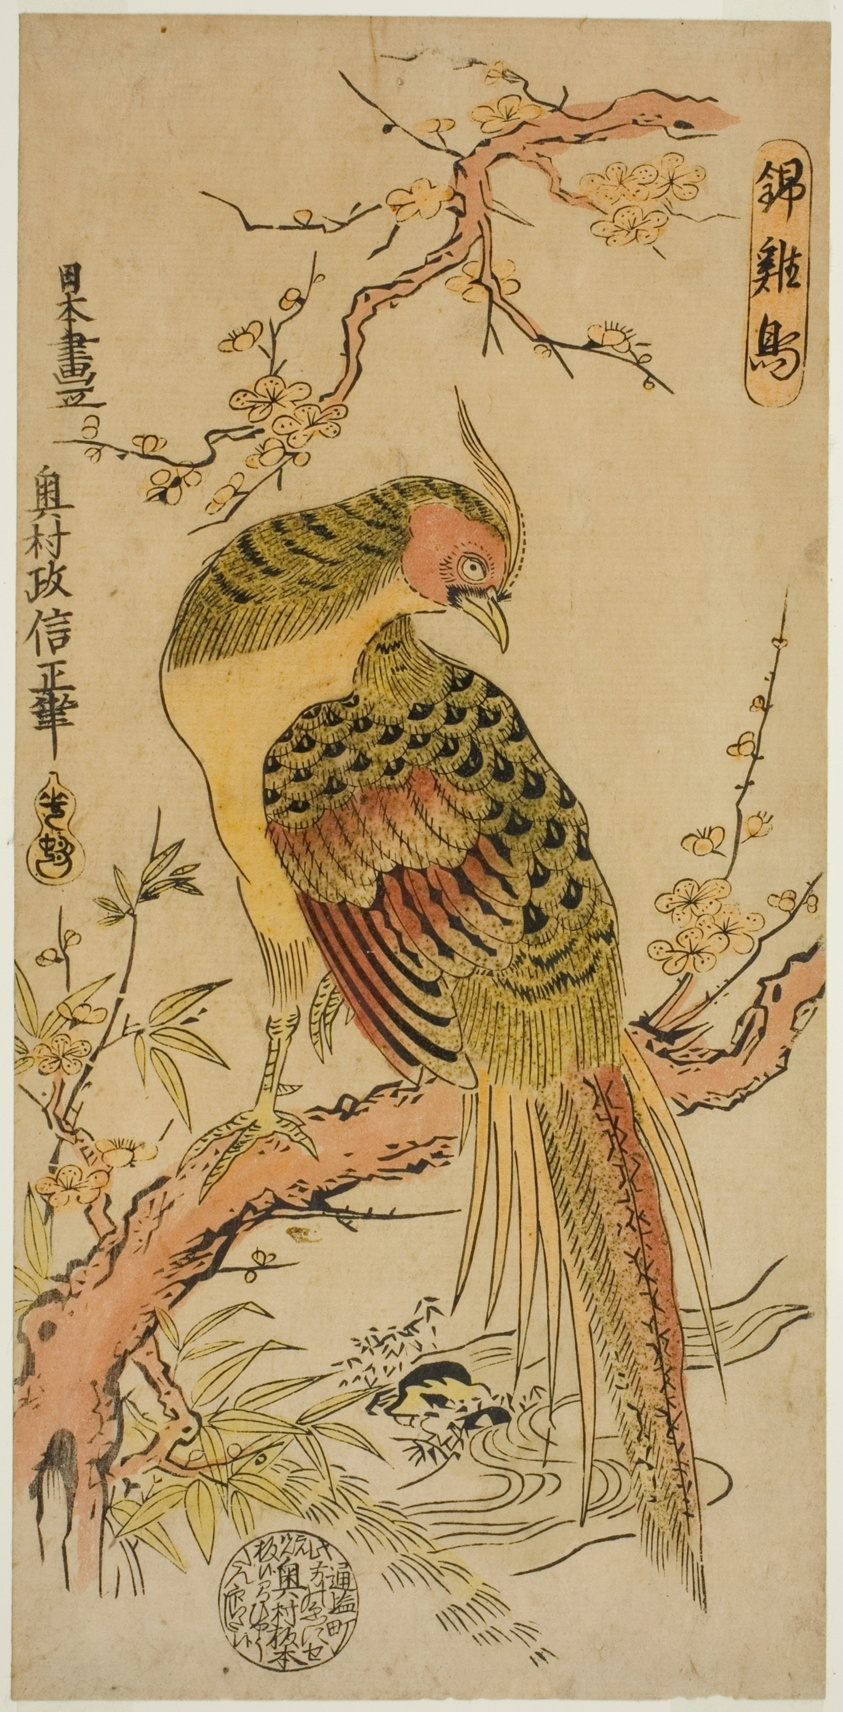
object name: Print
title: Golden Pheasant (Kinkeicho)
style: Japanese (culture or style)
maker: Okumura Masanobu (Japanese, 1686-1764)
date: c. 1720/25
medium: Hand-colored woodblock print; hosoban, urushi-e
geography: Japan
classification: woodblock print; print; asian art